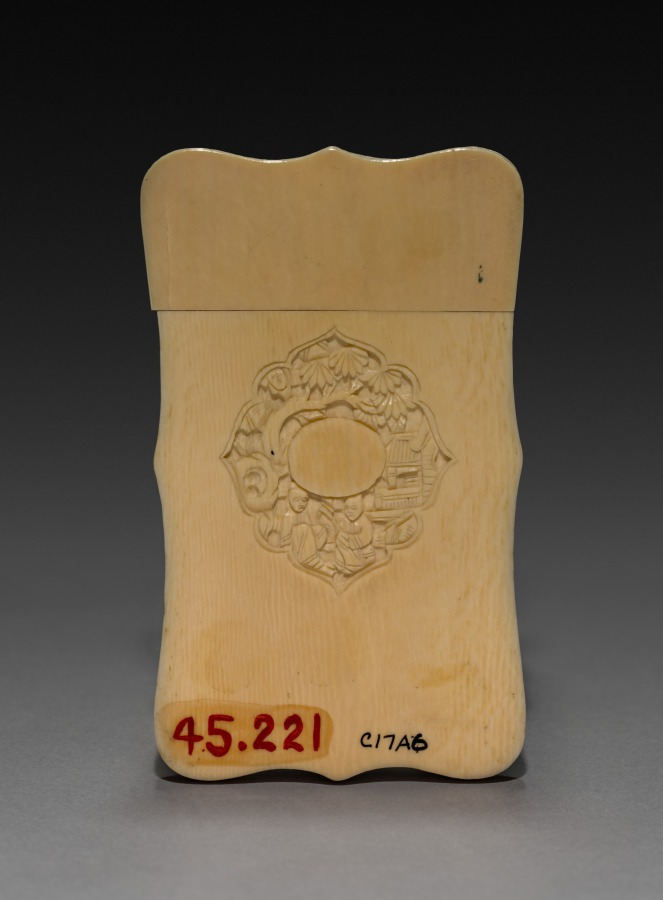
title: Card Case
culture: Japan, Meiji period (1868–1912)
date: early 1900s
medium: ivory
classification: Ivory